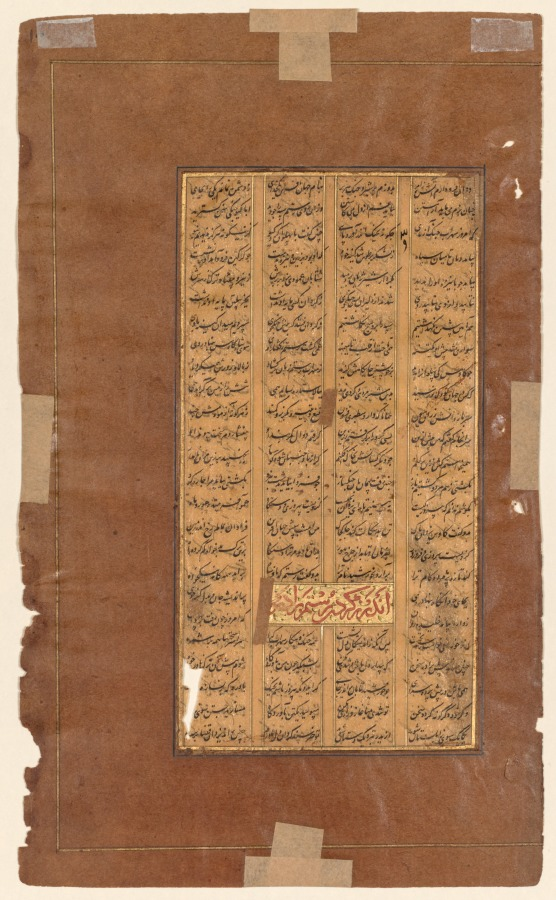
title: Text of Rustam and Suhrab, from the Shah-nama of Firdausi (Persian, c. 934–1020) (recto)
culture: India, Bijapur, Deccan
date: c. 1610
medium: Gum tempera, ink, and gold on paper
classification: Painting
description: This page of text from the jewel-like copy of the Shah-nama made in the southern Indian city of Bijapur describes the events leading to Rustam’s accidental slaying of his own son Suhrab. The larger text in red is a chapter heading, which reads: “The single combat between Rustam and Suhrab once more.”